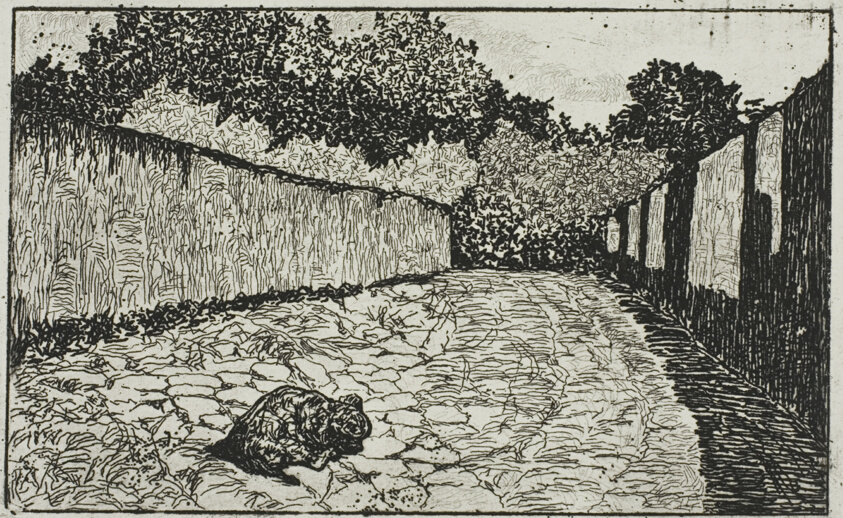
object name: Print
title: Small Street on the Outskirts of Florence with Puppy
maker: Giovanni Fattori (Italian, 1825-1908)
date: 1870–75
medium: Etching and aquatint, from a zinc plate, in black on ivory wove paper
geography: Italy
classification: etching; print; prints and drawing